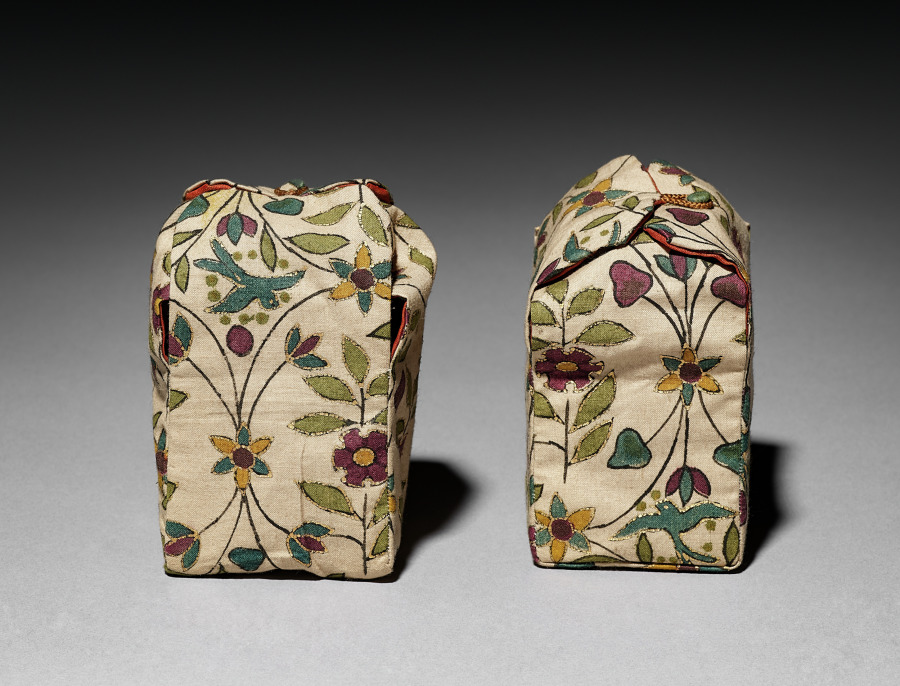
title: Pair of Tea Containers with Plum Blossoms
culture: Japan, Edo period (1615–1868)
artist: Aoki Mokubei (Japanese, 1767–1833)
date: early 1800s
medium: porcelain with underglaze blue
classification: Ceramic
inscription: signed "Ro Mokubei" on base in underglaze blue.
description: Aoki Mokubei, born into a family of restaurateurs, was a potter, calligrapher, painter, and scholar, and is considered one of the three masters of later Edo period Kyoto ceramics. He specialized in porcelains fashioned after Chinese prototypes, and created works for steeped tea (sencha) such as these matching tea caddies decorated in an underglaze blue called sometsuke—literally “with applied dye.” He signed them on their bottoms. They also have intricately patterned silk sleeves to both beautify and protect them. On the exterior of the lid of the outer wooden box that contains them, it is written that Mokubei inscribed and painted an image on the box. On the interior of the lid, the signature and seals of a former owner are written. Mokubei has signed the lid of the inner box, and a charming ink and light color composition of West Lake in Hangzhou in China covers its three sides. On the fourth side is a long inscription by Mokubei describing the scene.